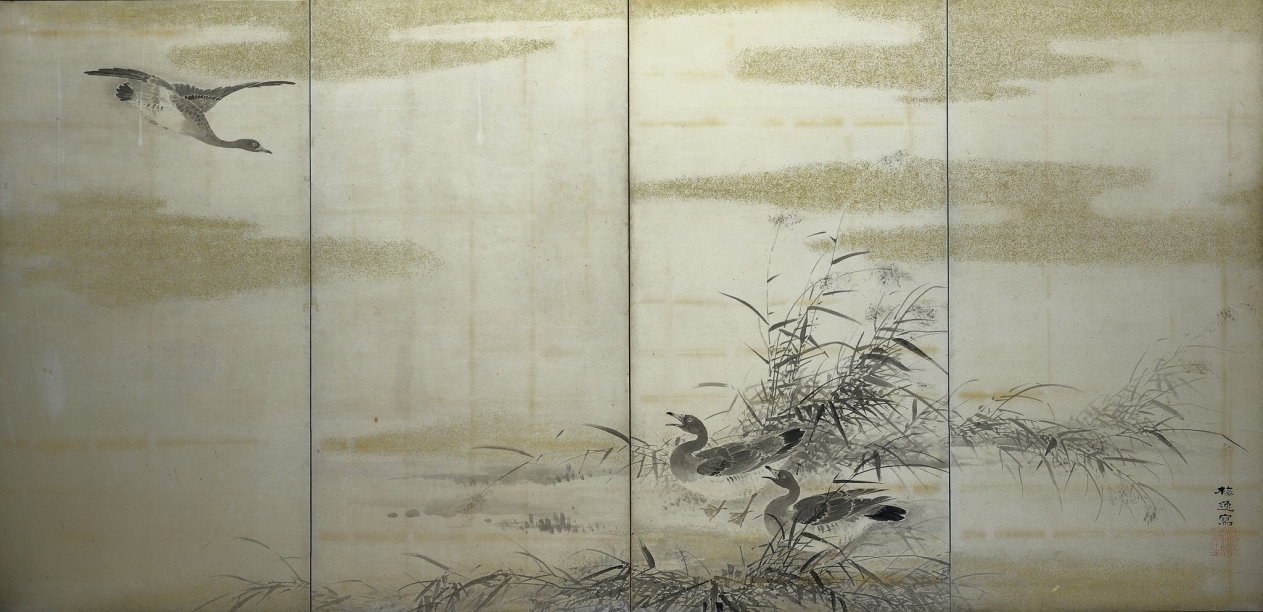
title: Geese, Reeds, and Water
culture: Japan, Edo period (1615–1868)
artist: Yamamoto Baiitsu (Japanese, 1783–1856)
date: 1800s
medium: One of a pair of four-panel folding screens; ink, color, and cut gold foil on paper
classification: Painting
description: This byōbu composition differs from most in that it comprises two four-panel screens, rather than two six-panel units. Since the current mounting is modern, it is impossible to determine whether its present configuration represents its original design. Some panels may have been removed to help the screens better fit into a modern interior space. Baiitsu worked almost exclusively in monochromatic ink tones and favored classical Chinese painting themes.